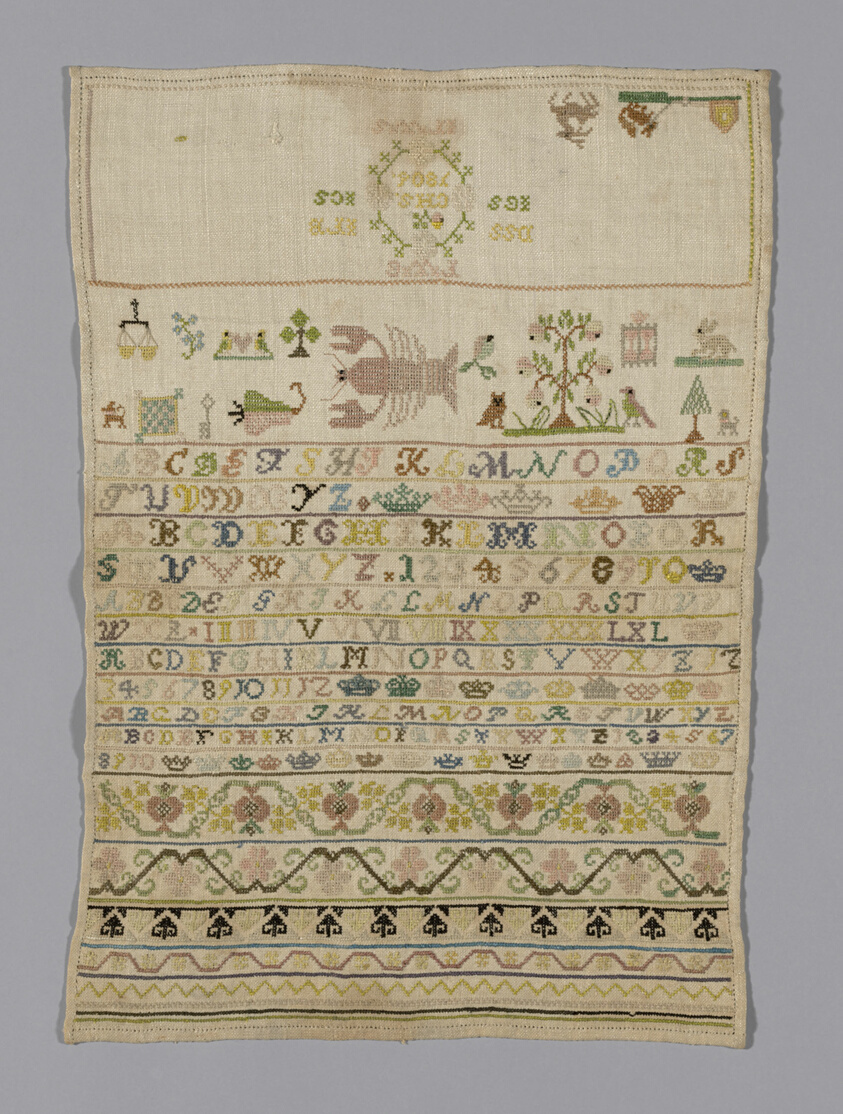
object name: Textile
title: Sampler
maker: Germany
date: 1806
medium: Linen, plain weave; embroidered with silk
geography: Germany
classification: textile; needlework (visual works); sampler